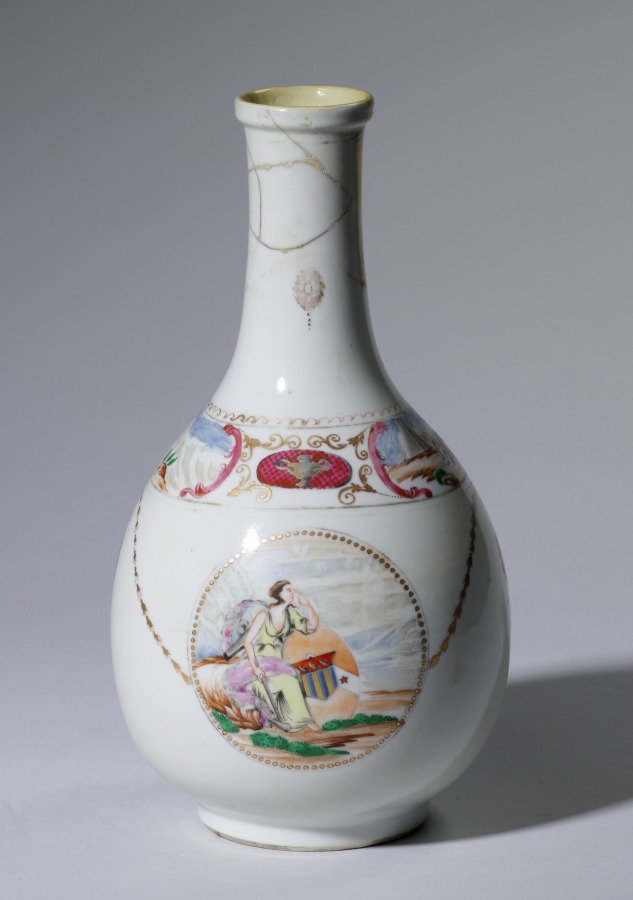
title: Bottle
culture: China, Chinese Export, early 19th century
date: c. 1800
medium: porcelain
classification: Ceramic